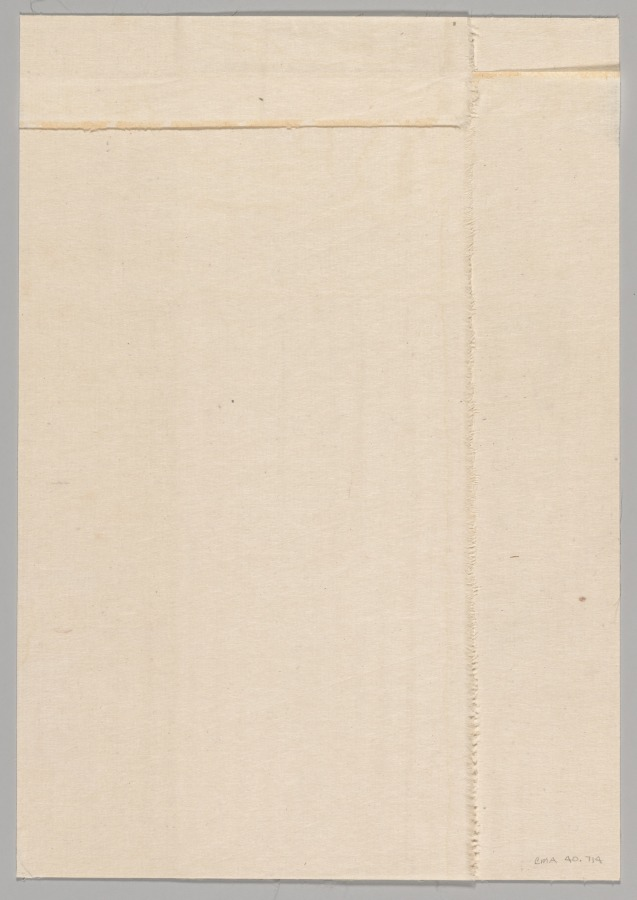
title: Harumichi no Tsuraki from the series A Pictorial Commentary on One Hundred Poems by One Hundred Poets, no. 31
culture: Japan, Edo period (1615–1868)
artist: Utagawa Kunisada (Japanese, 1786–1865)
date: 1844–47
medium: color woodblock print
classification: Print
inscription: Signature: Kunisada the Second Toyokuni